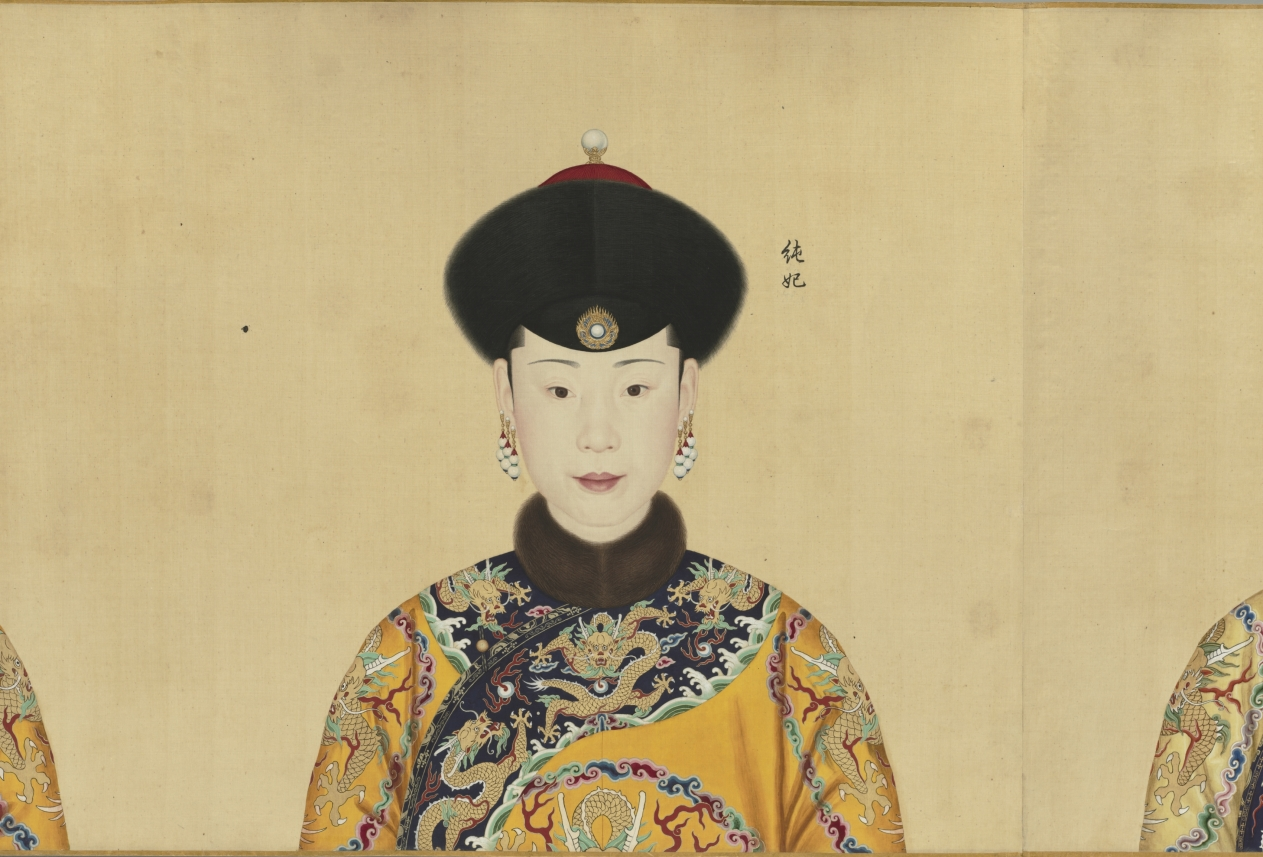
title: Portraits of the Qianlong Emperor and His Twelve Consorts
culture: China, Qing dynasty (1644–1911), Qianlong reign (1736–95)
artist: Giuseppe Castiglione (Italian, 1688–1766)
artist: and others (Chinese)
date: 1736–70s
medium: Handscroll; ink and color on silk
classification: Painting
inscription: 9 seals of the Qianlong emperor (r. 1736–95).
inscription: The eighth month, first year of Qianlong [1736] 乾隆元年八月吉日. The Empress (Xiaoxian) 皇后 (1712–1748), The Guifei (Huixian) 貴妃 (?-–1745), Chunfei 純妃 (1713–1760), Jiafei 嘉妃 (?–1755), Lingfei 令妃 (1727–1775), Shufei 舒妃 (1728–1777), Qingbin 慶嬪 (1724–1774), Yingbin 穎嬪 (1731–1800), Xinbin 忻嬪 (?–1764), Dunfei 惇妃 (1746–1806), Xunfei 順妃 (1749–1788), Shunbin 循嬪 (?–1797).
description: This portrait shows the Qianlong emperor at 26, in the first year of his reign. His likeness is followed by portraits of the empress and eleven consorts. Their portraits document the appearances of the court women around the time when they received their respective imperial titles, which occurred at different stages of the emperor's life. The first three portraits were done by the Jesuit (Roman Catholic) missionary artist Giuseppe Castiglione, whereas the later ones were by Chinese court painters. Formal portraiture contributed to the affirmation of status and construction of role and identity. This scroll served as both familial documentation and a "mind picture" of the Qianlong emperor, suggesting that his constructed image of emperorship was inseparable from concepts of self and family. It was stored in a carved red lacquer box bearing the original painting title Mind Picture of a Well-Governed and Tranquil Reign (see CMA 1969.32).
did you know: Lingfei 令妃 (1727–1775), the first consort depicted in the maroon or “incense-colored" 香色 robe, was the mother of six of Qianlong’s children, including the future Emperor Jiaqing.